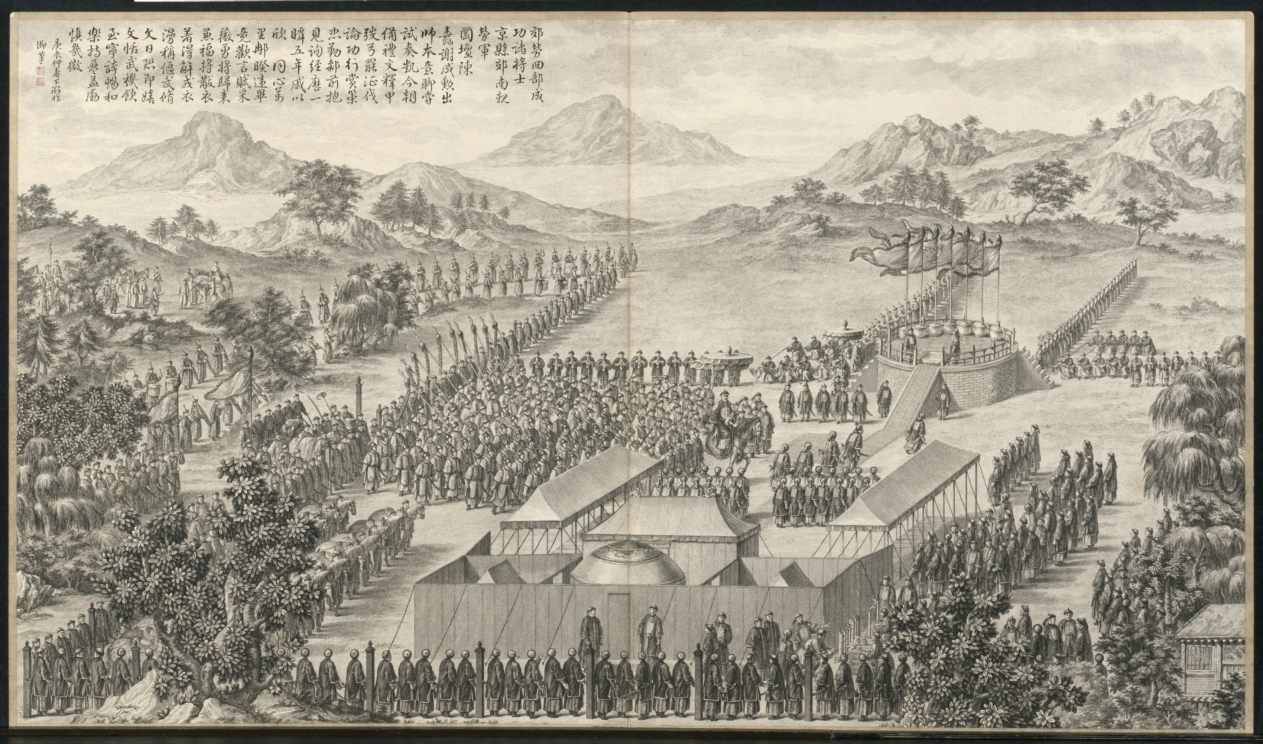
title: Rewards to Generals and Officers in Quelling the Uigurs: from Battle Scenes of the Quelling of Rebellions in the Western Regions, with Imperial Poems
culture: China, Qing dynasty (1644–1911), Qianlong period (1736–95)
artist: Jean Damascene Sallusti (Italian, d. 1781)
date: c. 1765–74; poem dated 1760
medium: etching, mounted in album form, 16 leaves plus two additional leaves of inscriptions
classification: Print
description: This set of etchings was commissioned by Emperor Qianlong to record in pictorial terms the courage of his generals and soldiers in quelling the rebellions in the Western Regions. Qianlong added his own poem to each of the etchings, indicating his appreciation and pride in this demonstration of military might. "Western Regions" refers to the present-day Xingjiang province, often described in Western writing as "Central Asia."